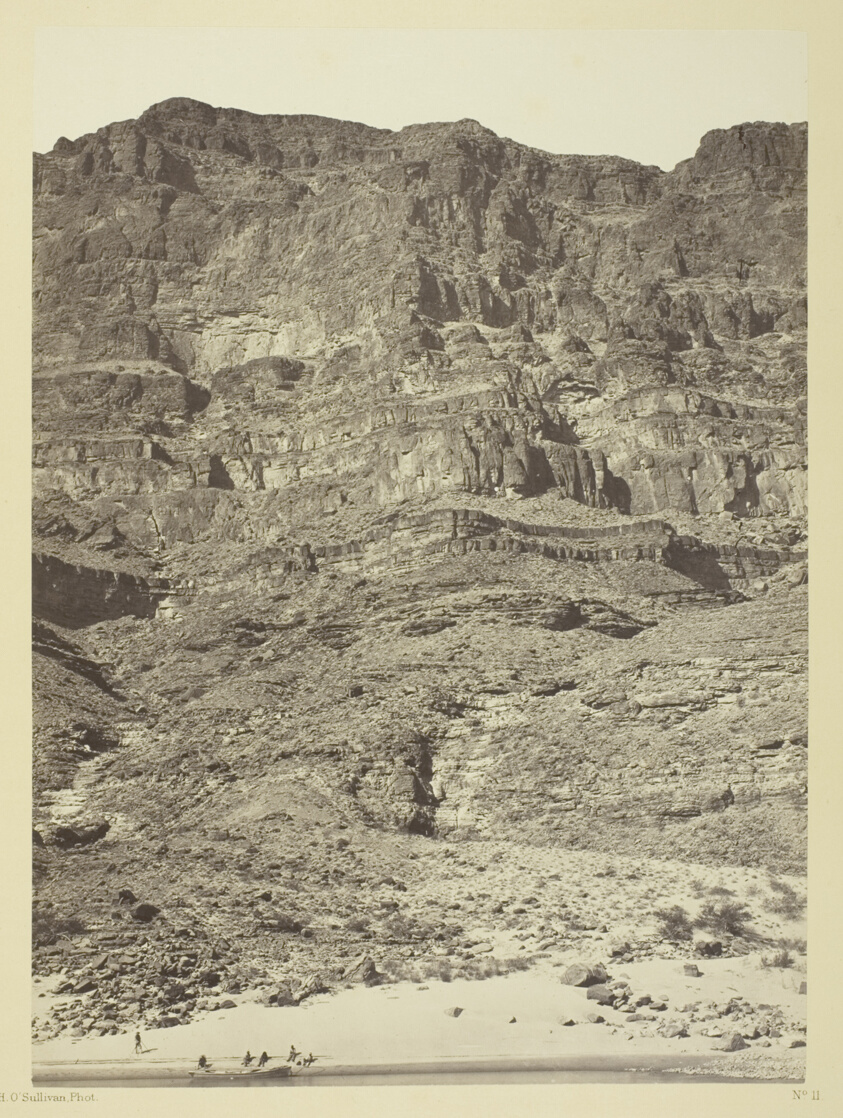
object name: Photograph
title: Wall in the Grand Cañon, Colorado River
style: 19th century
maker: Timothy O'Sullivan (American, born Ireland, 1840–1882)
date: 1871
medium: Albumen print, from the album "Geographical & Geological Explorations & Surveys West of the 100th Meridian," vol. 2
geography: United States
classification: albumen print from collodion negative; photograph; photography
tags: Collected by Hugh Edwards